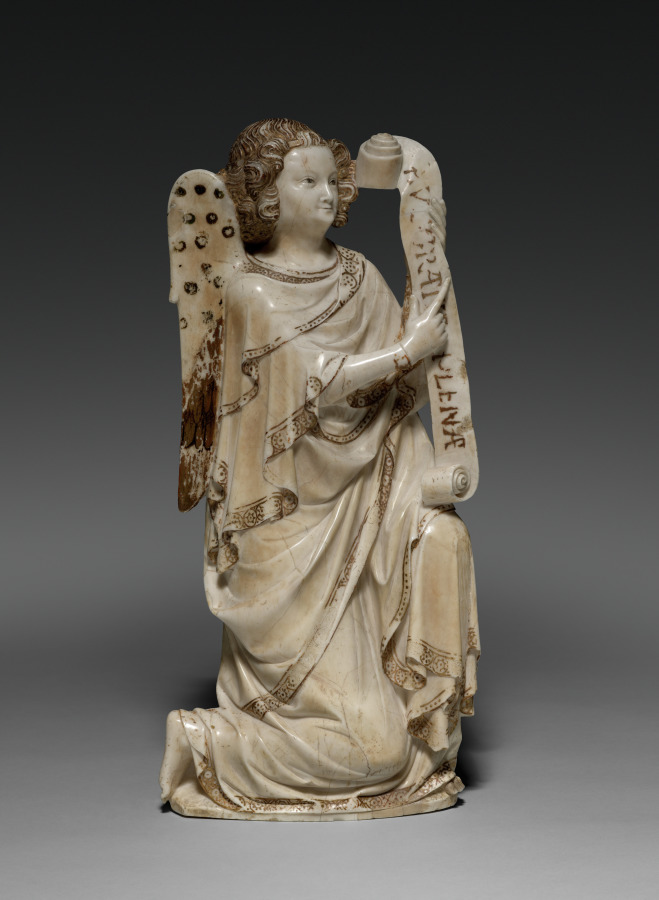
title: The Archangel Gabriel from an Annunciation Group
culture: France, Champagne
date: c. 1350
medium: alabaster with traces of paint and gilding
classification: Sculpture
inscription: Ave Maria, Gratia Plena.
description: In France, the use of alabaster began in the late 1200s for funerary monuments. The Archangel Gabriel, together with its counterpart, the Virgin Mary (now in the Louvre Museum, Paris) is part of an Annunciation. This is a rare example of alabaster sculpture from the 1300s. The alabaster comes from a quarry near Malaucène in Provence (France), making it an instance of long-distance trade of the rare material. Although the figure is very flat, it was likely made to also be viewed from the back, where there are remnants of gilding and the peacock feathers of the angel’s wing.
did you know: The surface of alabaster works can vary. By differentiating the intensity of polishing, it is possible for sculptures to create a surface with varying degrees of luster, or shine.